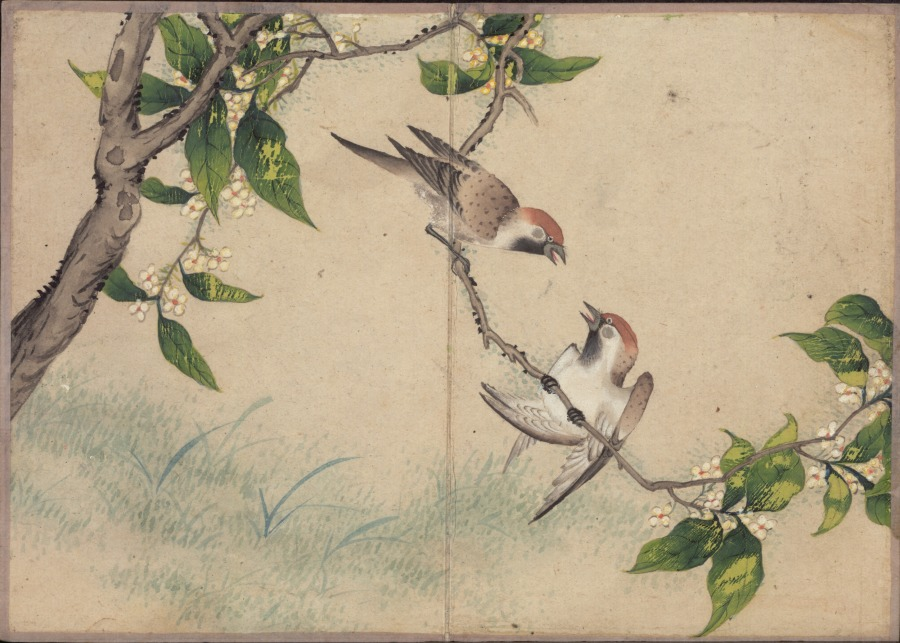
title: Desk Album: Flower and Bird Paintings (Gossiping Sparrows)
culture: China, Qing dynasty (1644-1911)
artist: Zhang Ruoai (Chinese, 1713–1746)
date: 1700s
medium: album leaf, ink and color on paper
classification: Painting